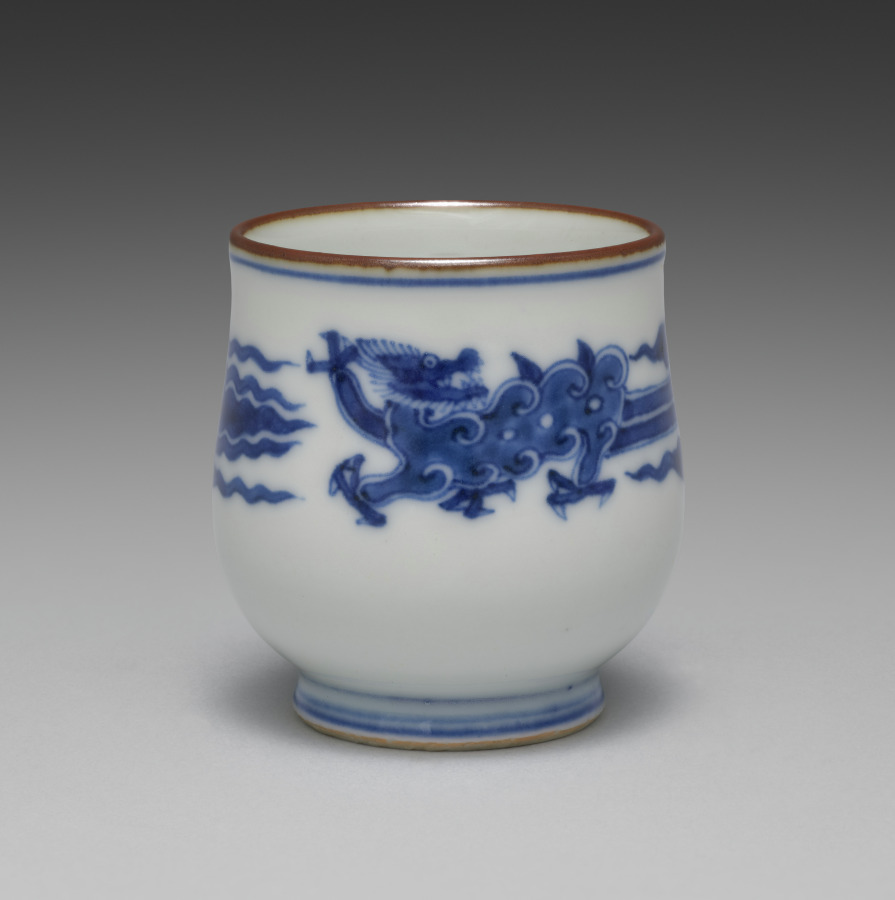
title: Cup from Sake Cups with Dragons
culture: Japan, Meiji period (1868–1912)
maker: Seifū Yohei III (Japanese, 1851–1914)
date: c. 1893–1914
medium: One from a set of six sake cups; porcelain with underglaze blue and iron oxide rims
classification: Ceramic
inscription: 大日本清風造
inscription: 清風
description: Each of these sake cups pictures two backward-looking dragons. The highly stylized creatures resemble jade carvings.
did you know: Seifū Yohei III was inspired by the Chinese mythical animals that were common on porcelain objects made at Jingdezhen in China during the Ming dynasty (1368–1644) and then exported around the world.